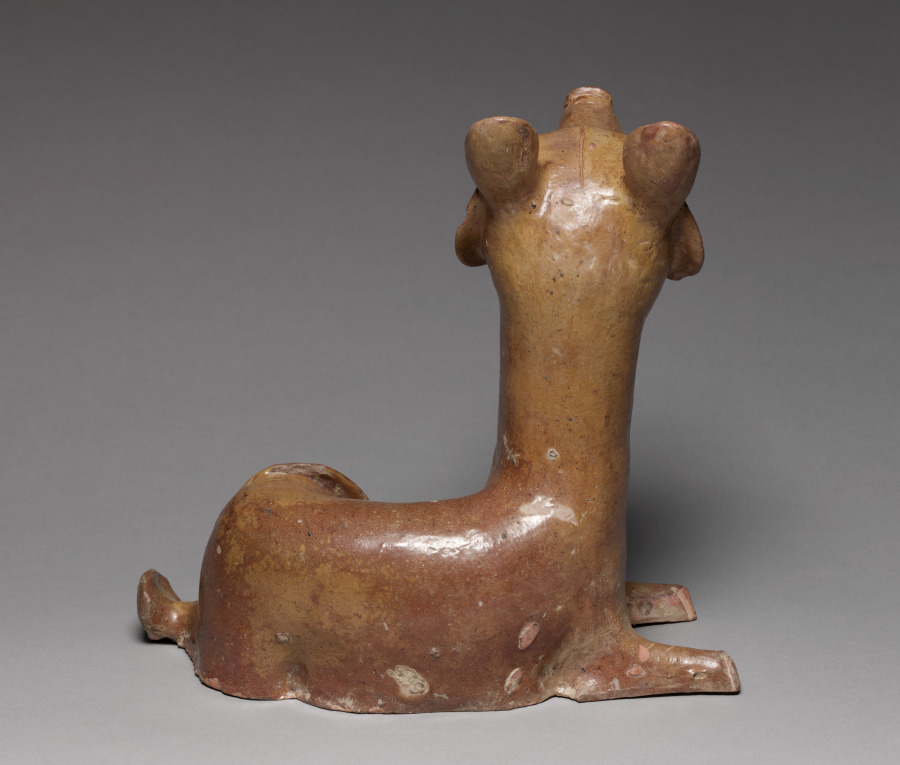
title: Dog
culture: China, Eastern Han dynasty (25–220 CE)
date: 25–220 CE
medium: earthenware with lead glaze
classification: Sculpture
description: Modeled with a lively naturalism and light humor, this dog reflects the worldly tastes of Han China. It differs from the solemn animal images on ritual bronze vessels, which served as the medium for communication with the supernatural realms. The Han people held beliefs in a worldly paradise and an otherworldly realm of eternal life and happiness.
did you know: The dog's muzzle, whiskers, and neck scruff were boldly incised into the earthenware form.